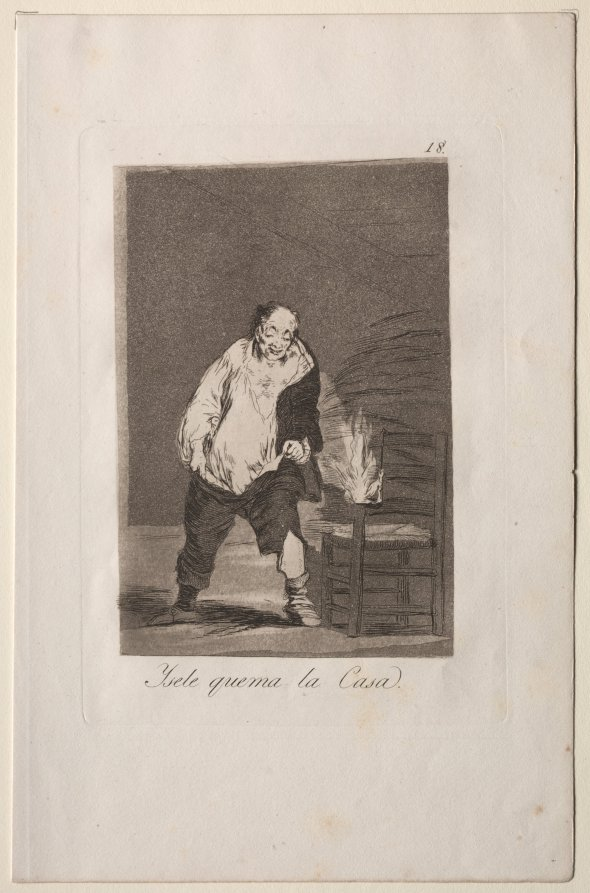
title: And His House is on Fire, Plate 18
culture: Spain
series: Los Caprichos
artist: Francisco de Goya (Spanish, 1746–1828)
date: 1799 (printed c. 1855)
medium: etching and aquatint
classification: Print